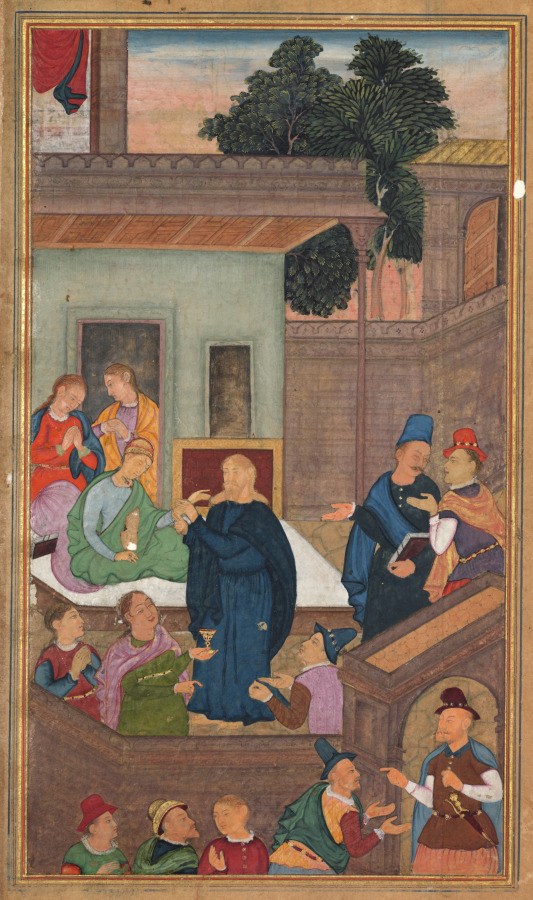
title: Jesus Raises Jairus’s Daughter from the Dead (folio 82 verso), from a Mirror of Holiness (Mir’at al-quds) of Father Jerome Xavier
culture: Mughal India, Allahabad, made for Prince Salim (1569–1627)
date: 1602–4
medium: Gum tempera, ink, color, and gold on paper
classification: Manuscript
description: Jesus gestures toward the 12-year-old girl he has awakened from the dead, in a lesser-known miracle included in Father Jerome’s text. The elder of a synagogue, the girl’s father, named Jairus, had shown great faith in Jesus and had begged him to help his daughter; Jairus may be the figure dressed as a Jesuit in a dark cloak and tall matching cap behind Jesus. Jesus admonished the crowd to tell no one about the miracle, but people turn and gesture to one another, unable to keep from spreading the news.